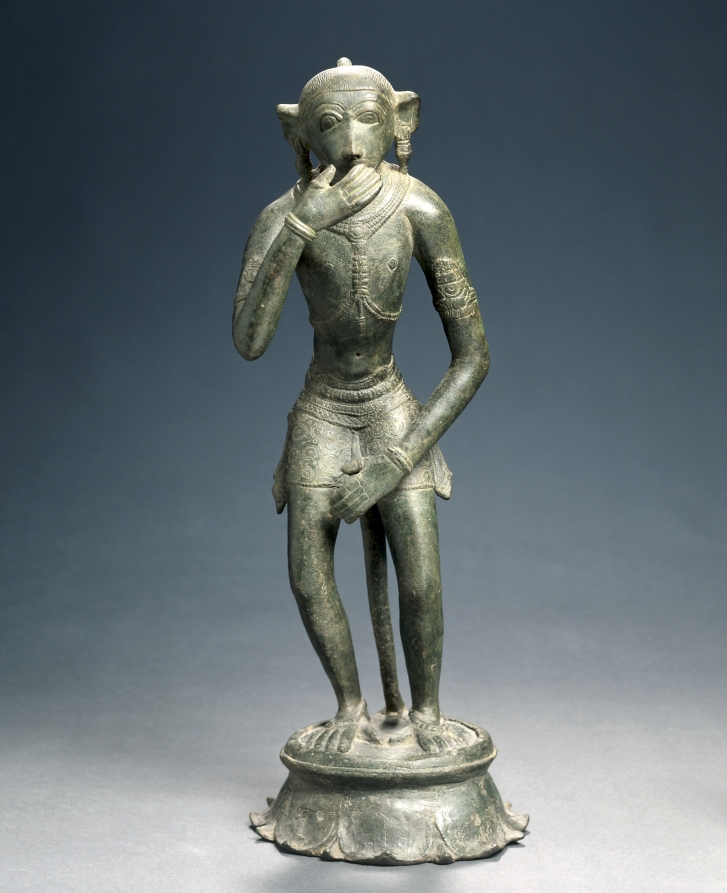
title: Monkey General Hanuman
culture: Southern India, Chola period (900s–1200s)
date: c. 1000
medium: bronze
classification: Sculpture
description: Hanuman is one of the most popular heroic figures of the epic Ramayana. In the story, he was indispensable in the search for the abducted wife of Rama, an incarnation of Vishnu. He is able to fly through the air and lift mountains, but here he is shown as a humble servant of the god. His gestures signify his humility and he bows slightly in reverence to his master. Bronzes during the Chola period spanning the 800s to 1200s were solid cast, using the lost-wax method. Each one is unique and would have been kept in the treasury of the temple until the festival day when the presence of the deity is invited to reside in the sculpture, which is then bathed, dressed, and paraded through the streets. This figure would have been paraded with a group of other images depicting Rama, his wife, and his brother.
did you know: Hanuman stands on a lotus pedestal with slightly upturned petals.